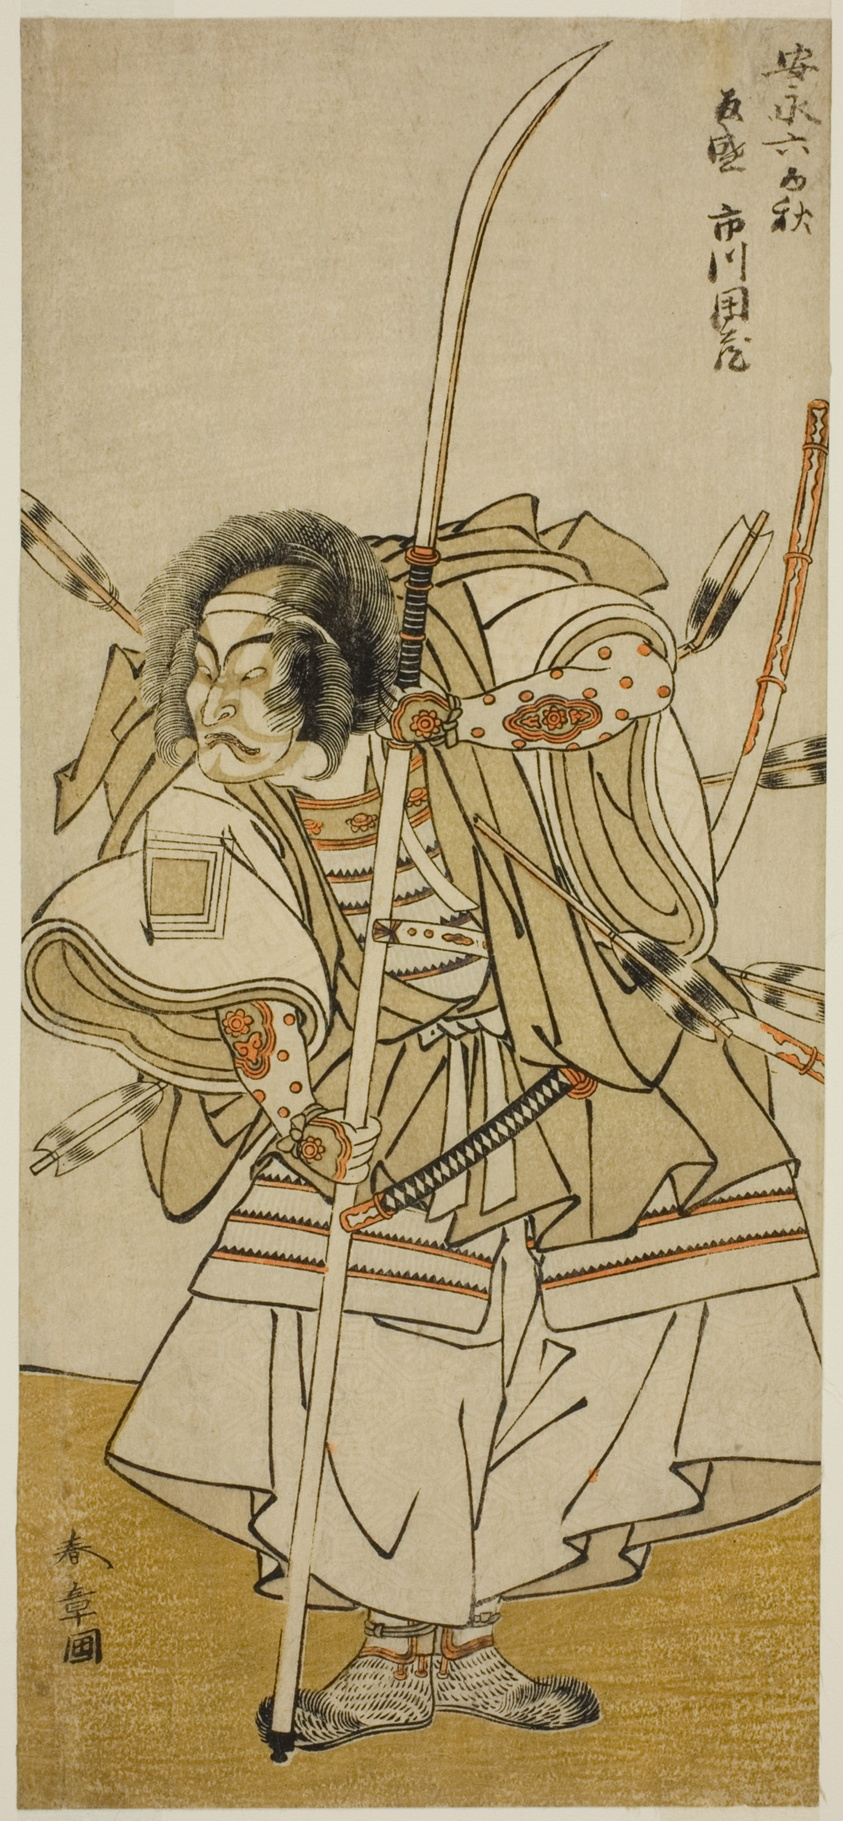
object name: Print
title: The Actor Ichikawa Danzo IV as Taira no Tomomori in the Play Yoshitsune Sembon-zakura, Performed at the Nakamura Theater in the Eighth Month, 1777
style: Japanese (culture or style)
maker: Katsukawa Shunsho 勝川 春章; Japanese, 1726-1792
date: c. 1777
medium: Color woodblock print; hosoban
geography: Japan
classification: woodblock print; print; asian art